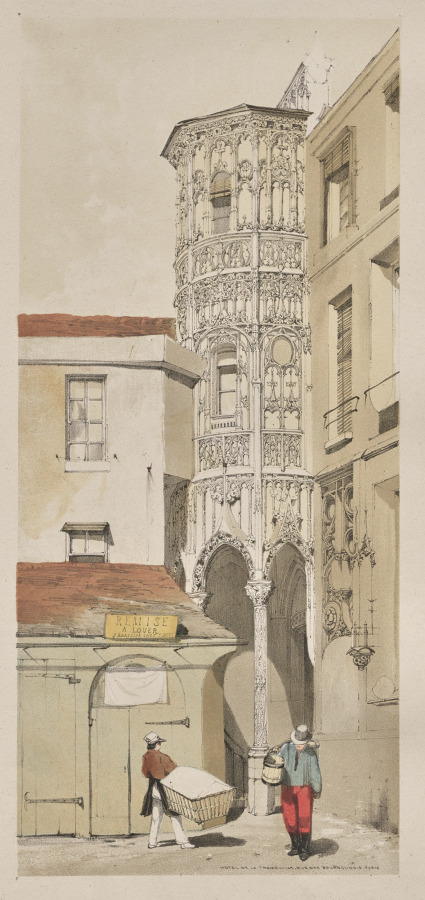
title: Picturesque Architecture in Paris, Ghent, Antwerp, Rouen: Hôtel de la Tremouille, Rue des Bourbonnois, Paris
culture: England, 19th century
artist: Thomas Shotter Boys (British, 1803–1874)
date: 1839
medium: lithograph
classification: Portfolio